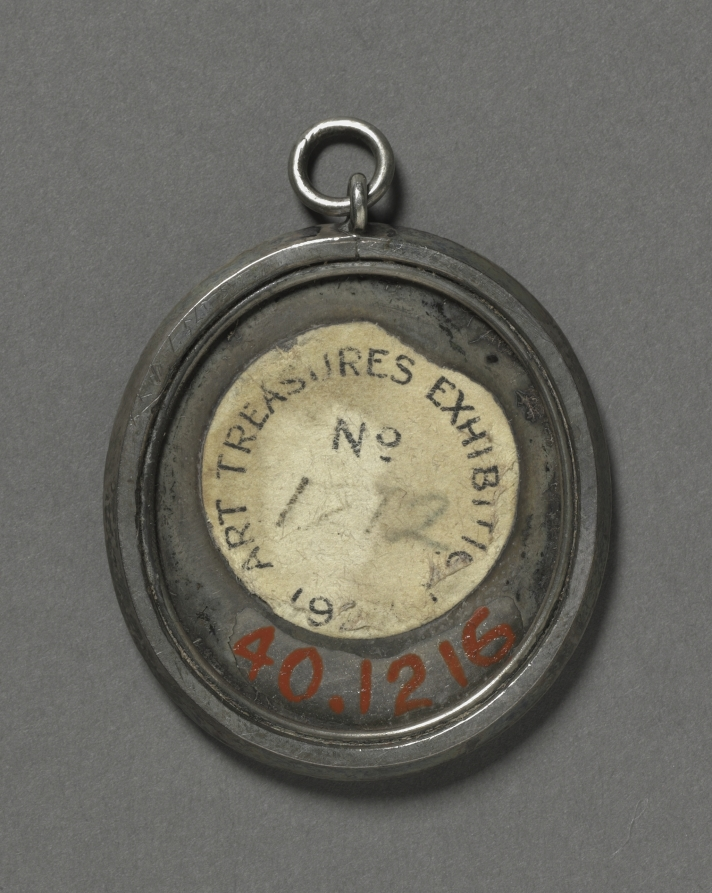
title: Portrait of King Louis XIV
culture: France, 17th century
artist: school of Jean Petitot (Swiss, 1607–1691)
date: 17th century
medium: enamel in a silver and diamond frame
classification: Portrait Miniature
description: Unlike fragile portrait miniatures painted in watercolor on vellum or ivory, which are prone to cracking, fading, and flaking, enamels are resilient, impervious to the effects of light, and retain their striking original colors over time. Partly for this reason enamel was considered ideal for reproducing famous paintings and treasured portraits in a reduced and luminous form. The complicated and labor-intensive process of enameling required the artist to fire numerous layers of colored metal oxide at different temperatures. This process made it difficult to produce a faithful portrait likeness, though masters of the medium were able create portraits of remarkable subtlety imbued with the sitter's personality. The heyday of enamel painting was the late-seventeenth and early eighteenth centuries. Among the enamel specialists was the Swiss Jean Petitot, who was patronized by English King Charles I, French King Louis XIV, and Polish King John III Sobieski. His workshop produced many versions of this portrait of King Louis XIV, which would have been much in demand as a diplomatic gift from the king to loyal courtiers or foreign allies.